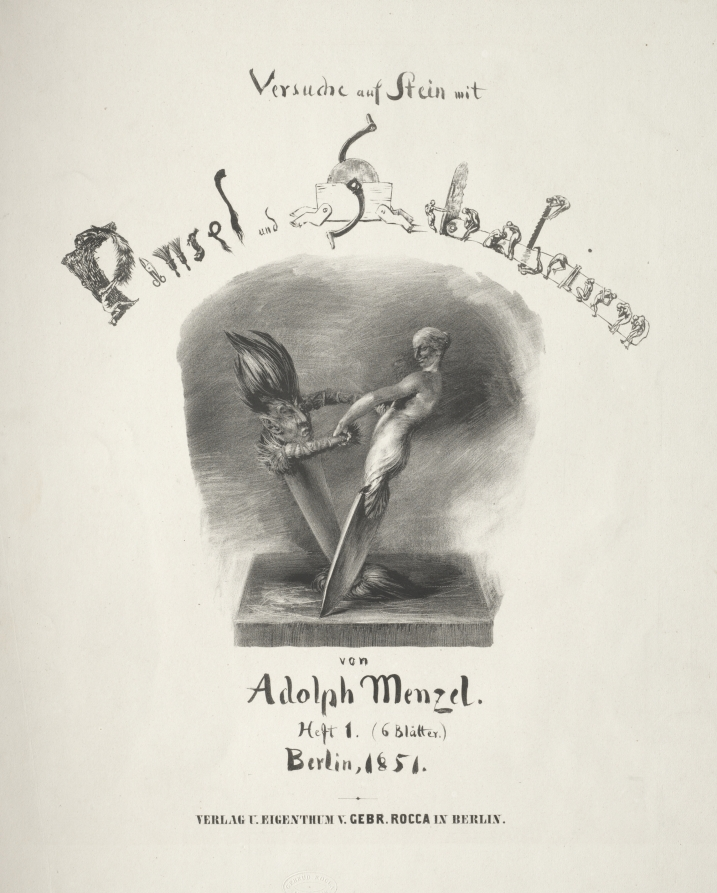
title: Essay on Stone with Brush and Scraper: Title Page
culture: Germany, 19th century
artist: Adolph von Menzel (German, 1815–1905)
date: 1851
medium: lithograph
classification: Print